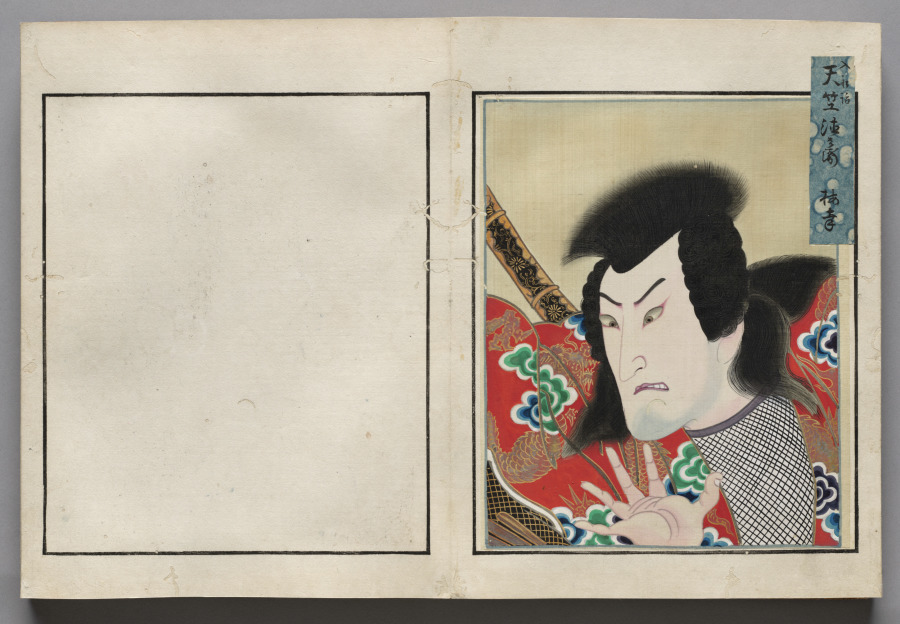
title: Double-Leaf from Album of Actor Portraits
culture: Japan, Edo period (1615–1868)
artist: Shōrakusai (Japanese)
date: c. 1790–1810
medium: double-leaf from an accordion-style album; ink and color on silk (left)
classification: Bound Volume